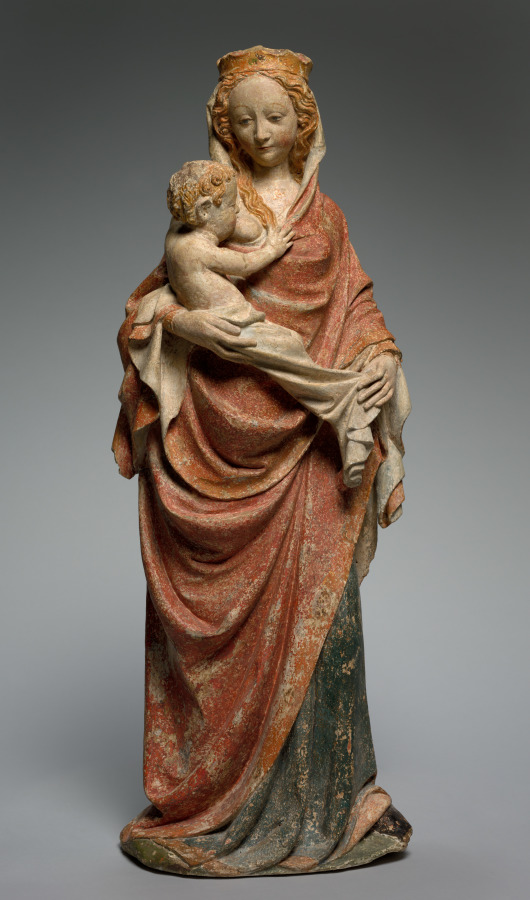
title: Virgin Nursing the Christ Child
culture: France, Île de France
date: c. 1370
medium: painted limestone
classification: Sculpture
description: This sculpture of the Virgin Mary nursing the Christ child subtly emphasizes the intimate relationship between mother and child and brings the Son of God in his human existence closer to the viewer. The emotional interaction is characteristic of sculpture since the mid-1300s, especially in the circles close to the court of the French kings in Paris and Emperor Charles IV (reigned 1346–78) in Prague. These novel stylistic tendencies were possibly a reaction to the fear and uncertainty incurred by the first great plague wave in 1348.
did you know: The back of this sculpture is unfinished since it would have originally been placed against a wall or pier.